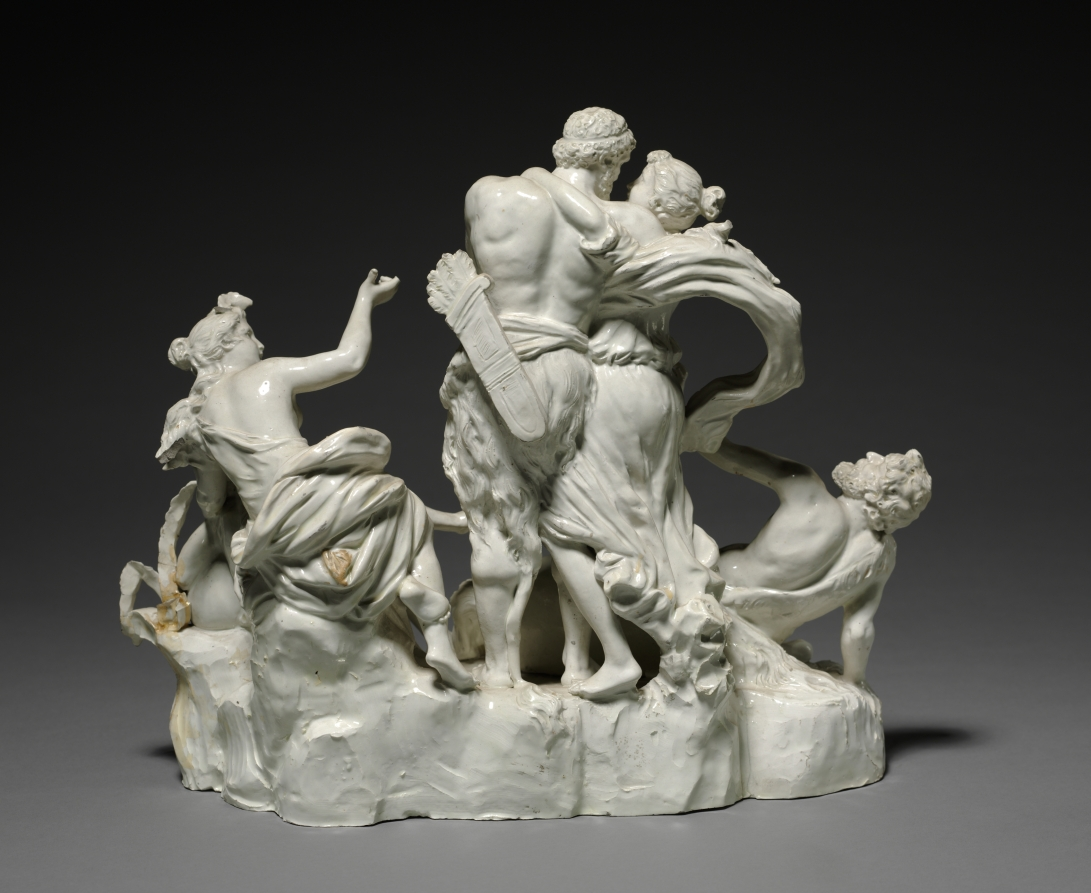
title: Hercules, Deianeira, and Nessus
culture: Italy, Naples, Capo di Monte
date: 1700s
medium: glazed ceramic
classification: Sculpture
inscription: Crowned "N" impressed in paste on the bottom.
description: Charles III, King of Naples, established the Capodimonte royal porcelain factory under his patronage in 1743. Responding to the success of Northern European porcelain factories, the Capodimonte group perfected their soft-paste porcelain and produced a variety of high-quality objects, ranging from Rococo-inspired decorative arts to more sculptural works. This unpainted figural group depicts the climax of an episode from the later life of Hercules. His heroic nature prevented Hercules from adapting to domestic life, much to the dismay of his wife, Dejanira. Growing tired of his absence, on one occasion Dejanira pursued Hercules. When she reached a river she could not cross, Dejanira accepted a ride from a centaur, Nessus, who, after taking her half way, attempted to abduct her. Here we see Dejanira clinging to her husband, who has arrived in time to slay Nessus with a poison-tipped arrow.